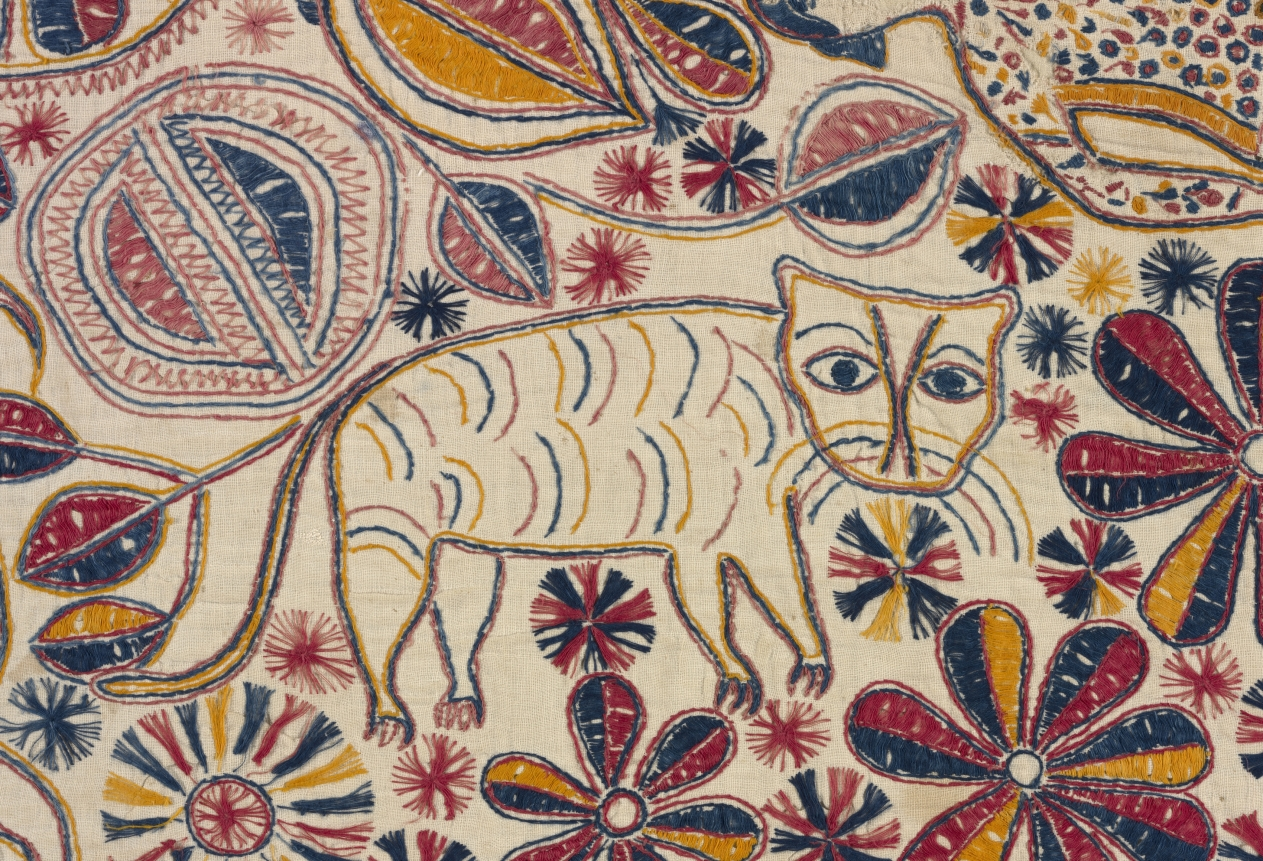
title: Kantha (Ceremonial Quilt)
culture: India, East Bengal, 19th century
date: 1800s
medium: embroidery: cotton thread on cotton tabby ground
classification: Embroidery